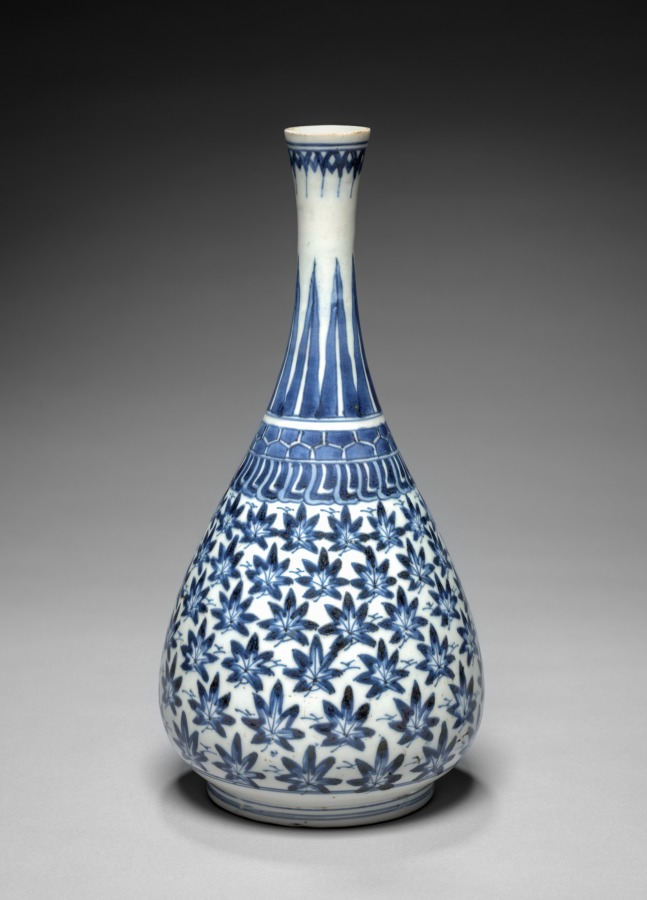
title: Bottle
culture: Japan, Edo period (1615–1868)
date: early 1600s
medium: porcelain painted in underglaze blue (Hizen ware, Arita type, Imari style)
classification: Ceramic